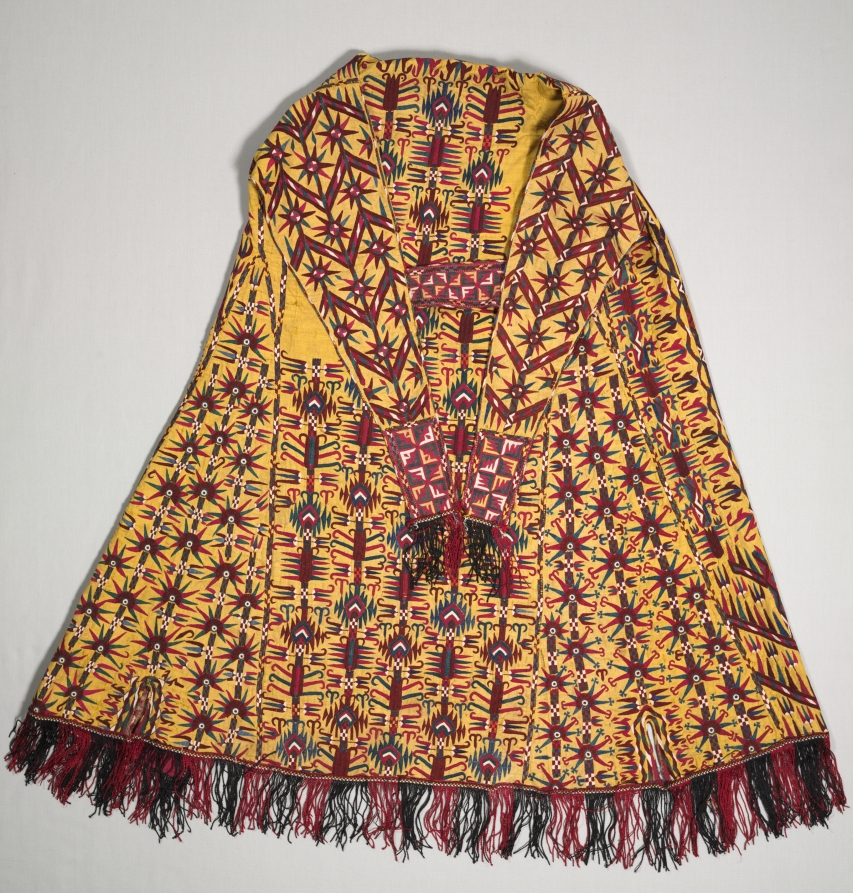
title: Woman’s Mantle (Chyrpy)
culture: Central Asia, Turkmenistan, Tekke tribe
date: late 1800s–early 1900s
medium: Exterior: silk; plain weave; embroidery: chain stitch; Trim: silk; tablet-woven with fringe; Lining: cotton; plain weave, block printed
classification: Garment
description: Traditional costumes in central Asia have distinctive characteristics that indicate ethnicity, age, and class. One of the oldest examples is a woman’s coat with false sleeves attached on the back and worn over the head. This silk coat in yellow, the color worn by middle-aged women, is elaborately decorated with popular stylized tulips embroidered in chain stitch. Worn consistently by a newlywed, the coat was later only used on special occasions. Although women made and embroidered garments at home, this expensive luxury mantle was professionally made and sold in the marketplace.